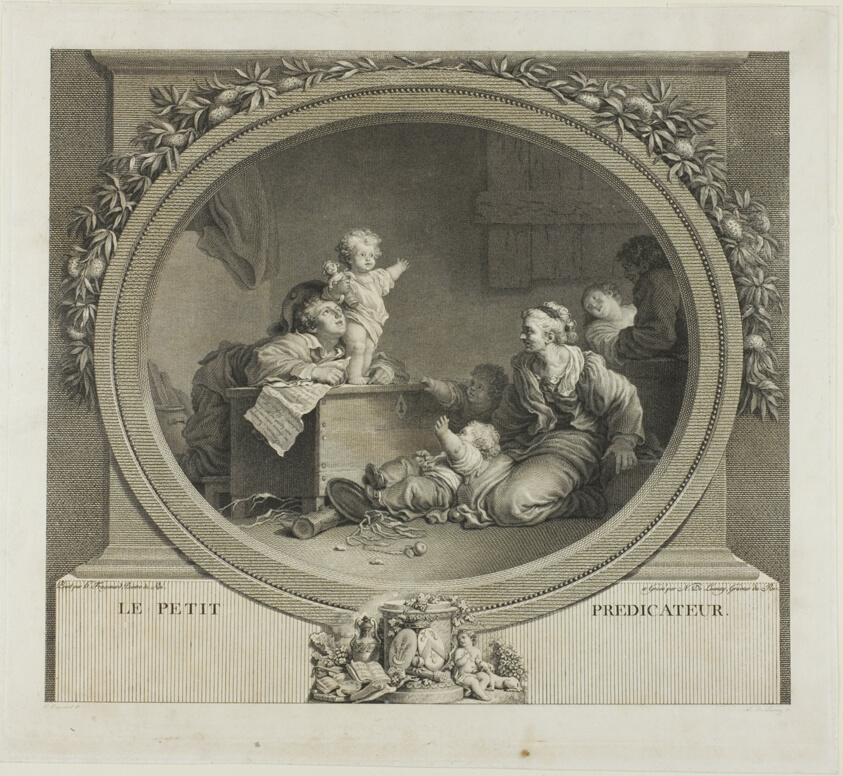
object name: Print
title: The Little Preacher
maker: Nicolas Delaunay (French, 1739-1792); after Jean-Honoré Fragonard (French, 1732-1806)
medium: Etching on paper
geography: France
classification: etching; print; prints and drawing